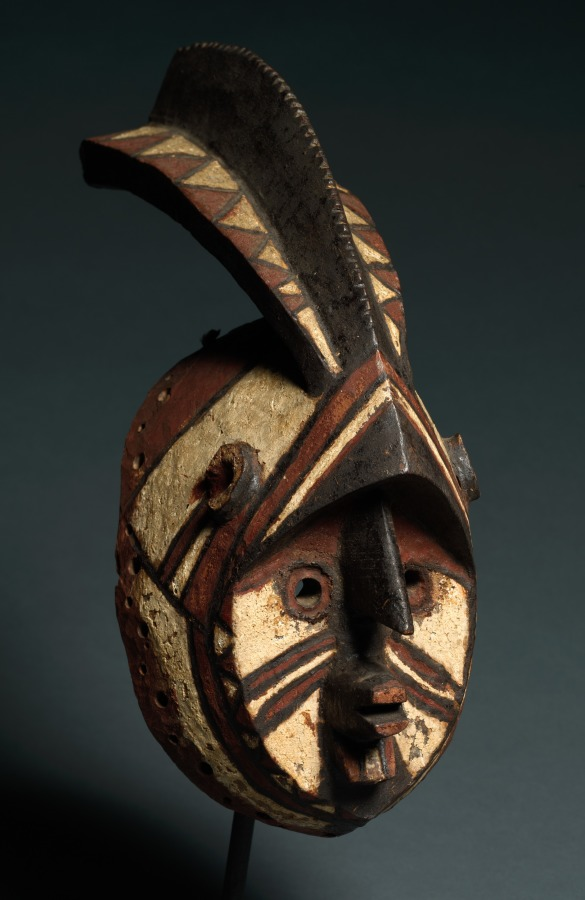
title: Mask (wan-balinga)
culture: Africa, West Africa, Burkina Faso, Mossi-style blacksmith-carver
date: early 1900s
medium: Wood and paint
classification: Mask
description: Only the farmers among the Mossi people employ masks. This mask’s proper name, wan-balinga, evokes a mythical figure who was the mother of the first Mossi ruler. Such masks are most typically worn and danced with on the occasion of the funeral of a male or female elder as escorts of the corpse to the grave. They also appear during annual memorial services that occur months after the actual burial, when all the deceased clan members are commemorated and honored.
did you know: This mask was worn and danced upon the death of an elder, escorting the corpse to the grave.